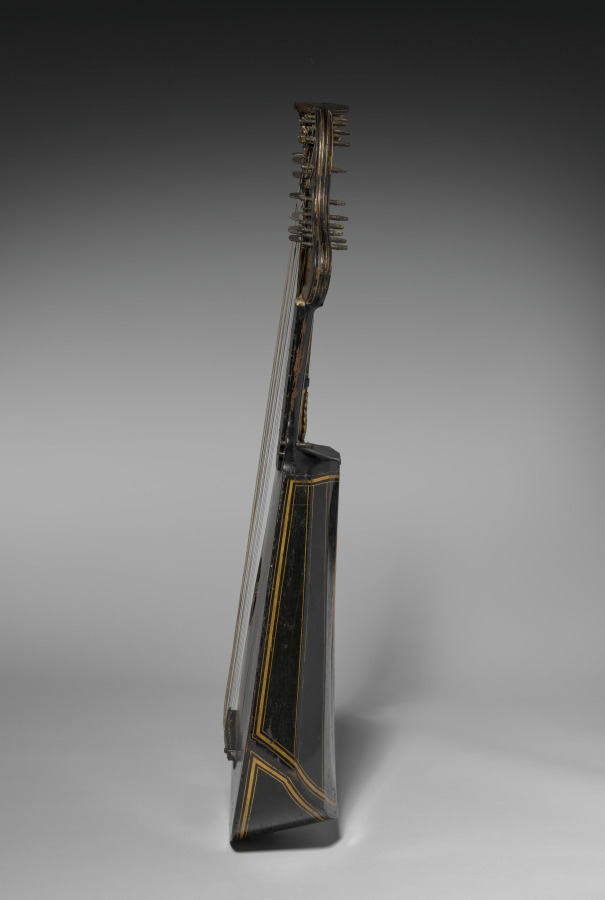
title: Harp-Lute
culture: England, London, 18th century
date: 1700s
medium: varnished wood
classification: Musical Instrument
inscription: the maker's name is illegible, but the number of the instrument is 14.